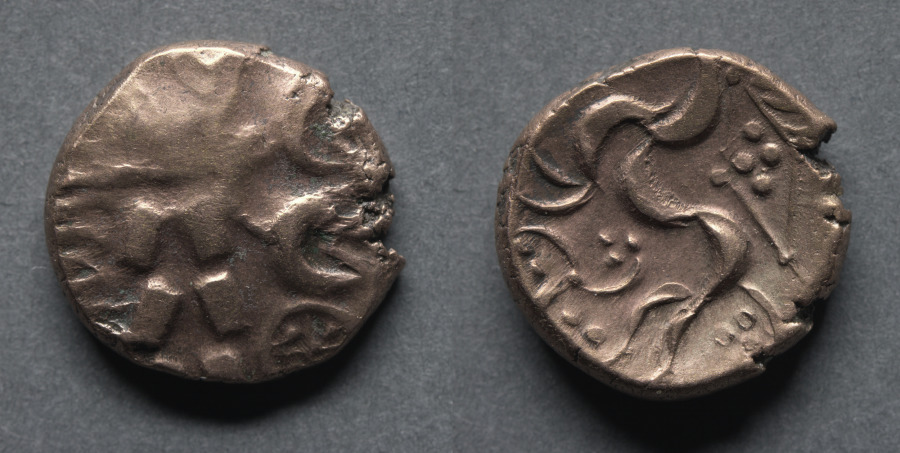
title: Stater: Wreath, Crescents, and Wheel (obverse); Horse and Diamond (reverse)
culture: England, Corieltauvi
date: 10 BCE–30 CE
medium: gold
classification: Coins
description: The Coritani were a Belgic tribe which occupied parts of middle-eastern England now known as the counties of Leicestershire, Rutland, Lincolnshire, Nottinghamshire, and probably parts of Derbyshire and the southern part of the West Riding of Yorkshire. At one time this type, together with others of the Ancient British series, were ascribed to the Brigantes, a tribe occupying parts of Yorkshire and territory north thereof.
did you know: The Corieltauvi were a largely agricultural people who had been producing coins since the beginning of the 1st century.